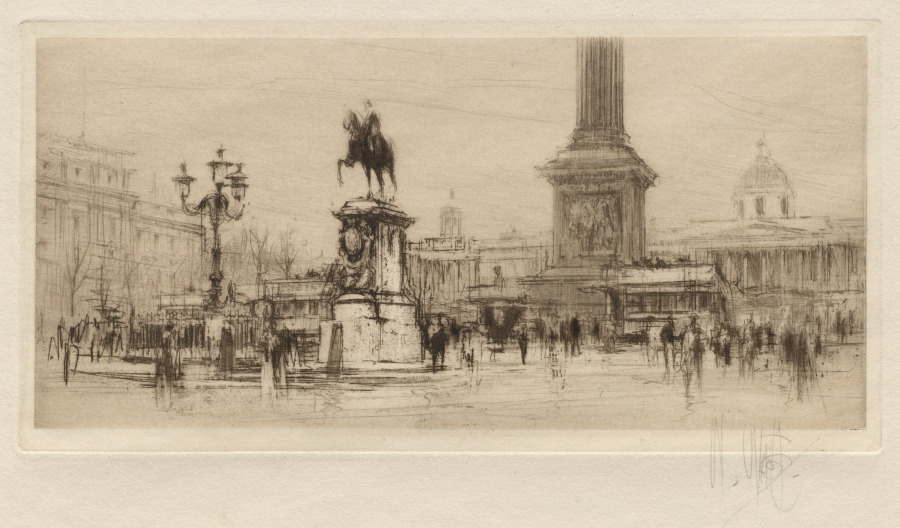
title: Trafalgar Square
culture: England, 20th century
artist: William Walcot (British, 1874–1943)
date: 1924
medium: etching, drypoint, and aquatint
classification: Print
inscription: Lower right, in graphite: W. Walcot